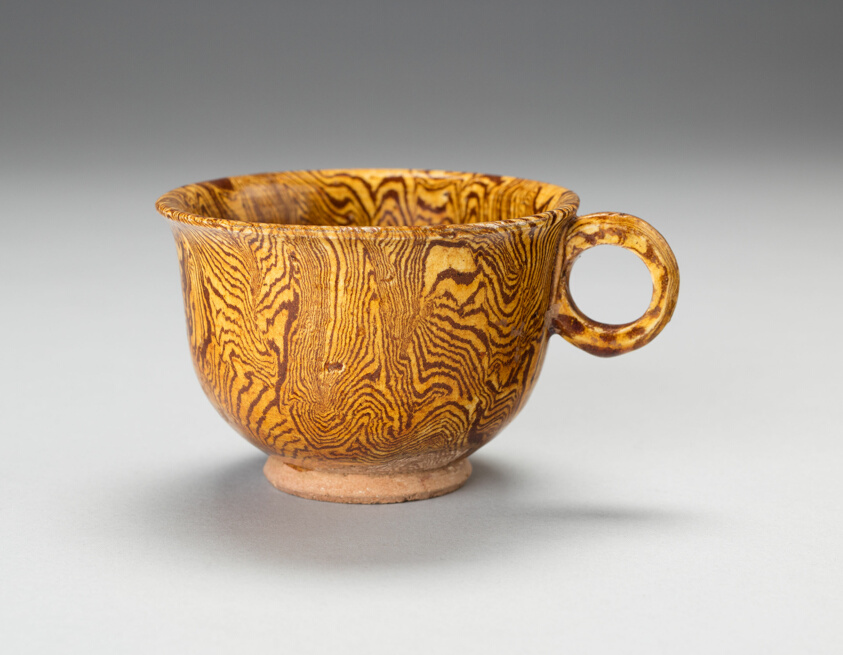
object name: Vessel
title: Ring-Handled Cup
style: Chinese (culture or style)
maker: China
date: Tang dynasty (618–906)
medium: Marbled earthenware with clear glaze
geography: China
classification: drinking vessel; vessel